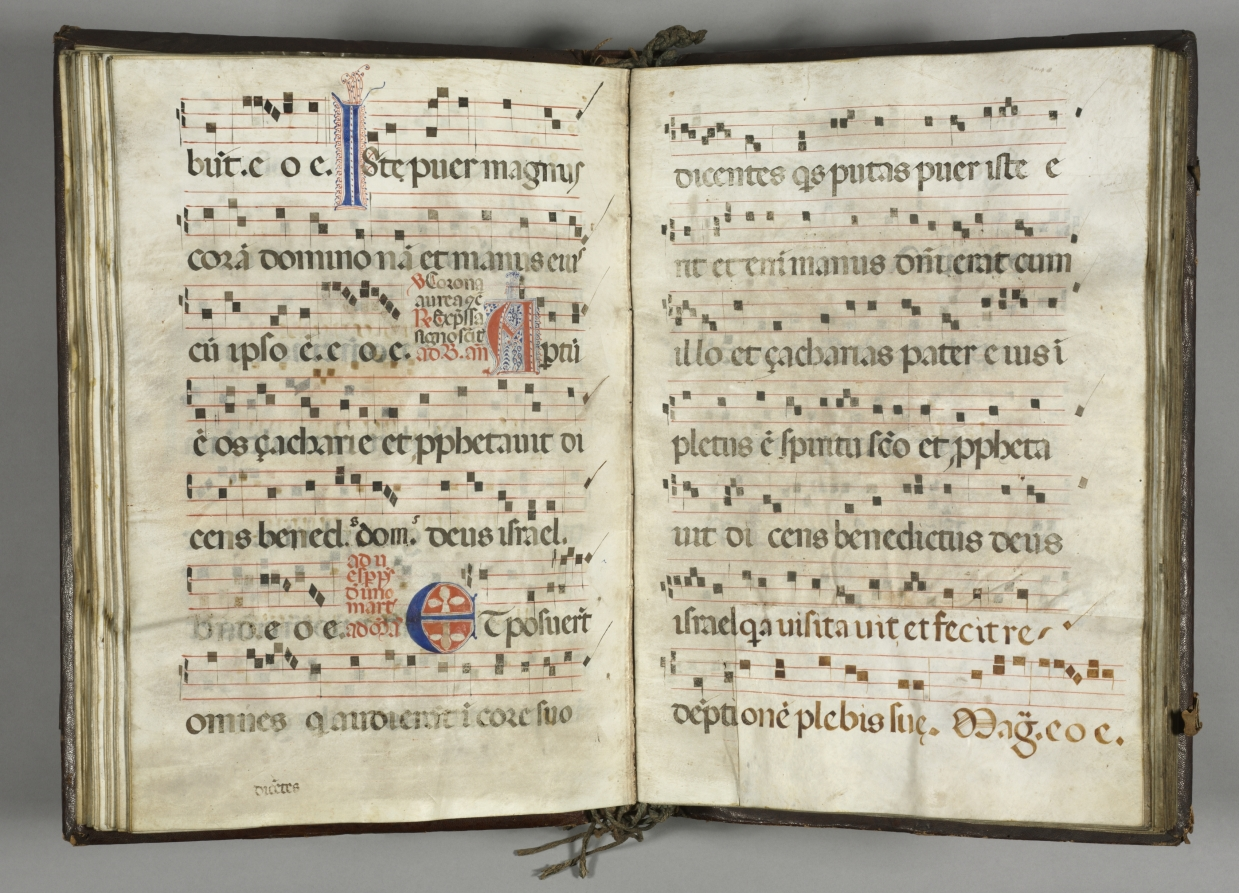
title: Choir Book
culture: Italy, 16th century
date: 1500s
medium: leather binding, copper alloy buckles, lead seal, parchment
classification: Manuscript